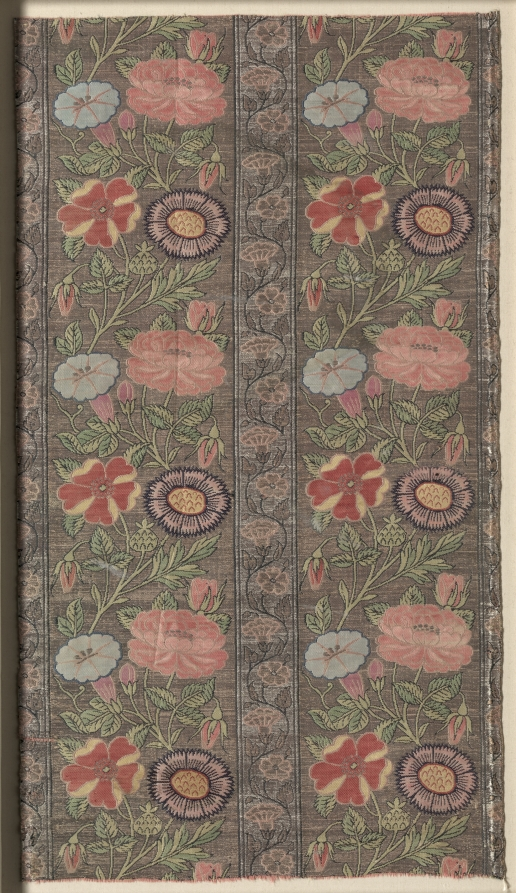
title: Floral striped silk on a golden ground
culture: Iran, Safavid period (1501–1722)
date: 1600–1650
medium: silk, gilt- and silver-metal thread: samite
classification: Textile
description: Twelve jewel-like colors of silk thread illustrate the vivacity of colors extolled in Iranian flowers on gilt- and silver-metal thread grounds. In a simplified seminaturalistic style, swaying branches support an exuberant array of blossoms in the Safavid tradition while the botanical accuracy of European prints inspired flora in varied angles and stages of maturity. Although celebrated in Iranian poetry for centuries, flowers were not featured in paintings and textiles until the 1640s, inspired by European herbals. This sturdy silk retains its radiant colors in contrast with many silks that have faded from excessive light exposure, especially the reds and pinks that were dyed with light-sensitive safflower dyestuff.